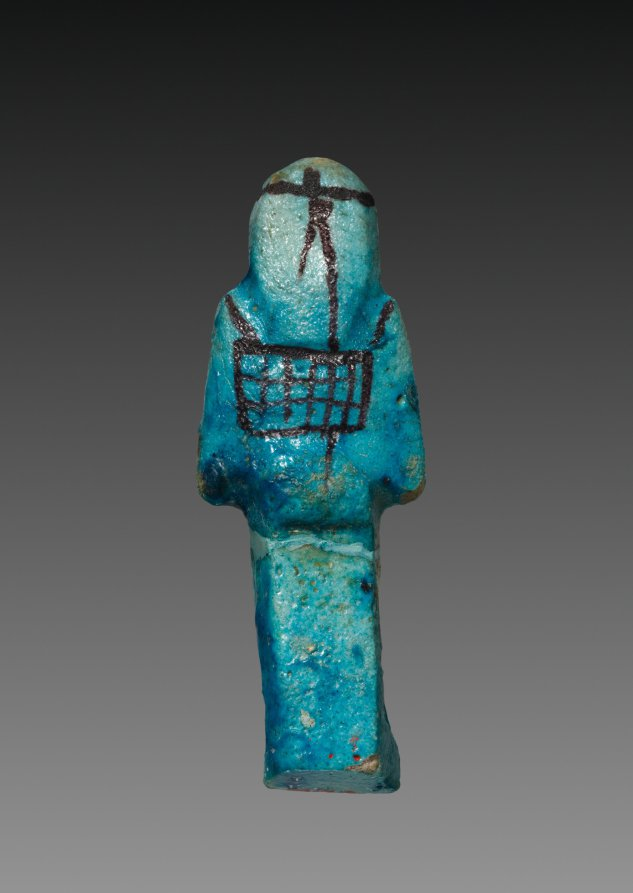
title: Shawabty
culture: Egypt, Third Intermediate (1069–715 BCE), Dynasty 21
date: c. 1000–945 BCE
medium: turquoise faience with black painted decoration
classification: Funerary Equipment